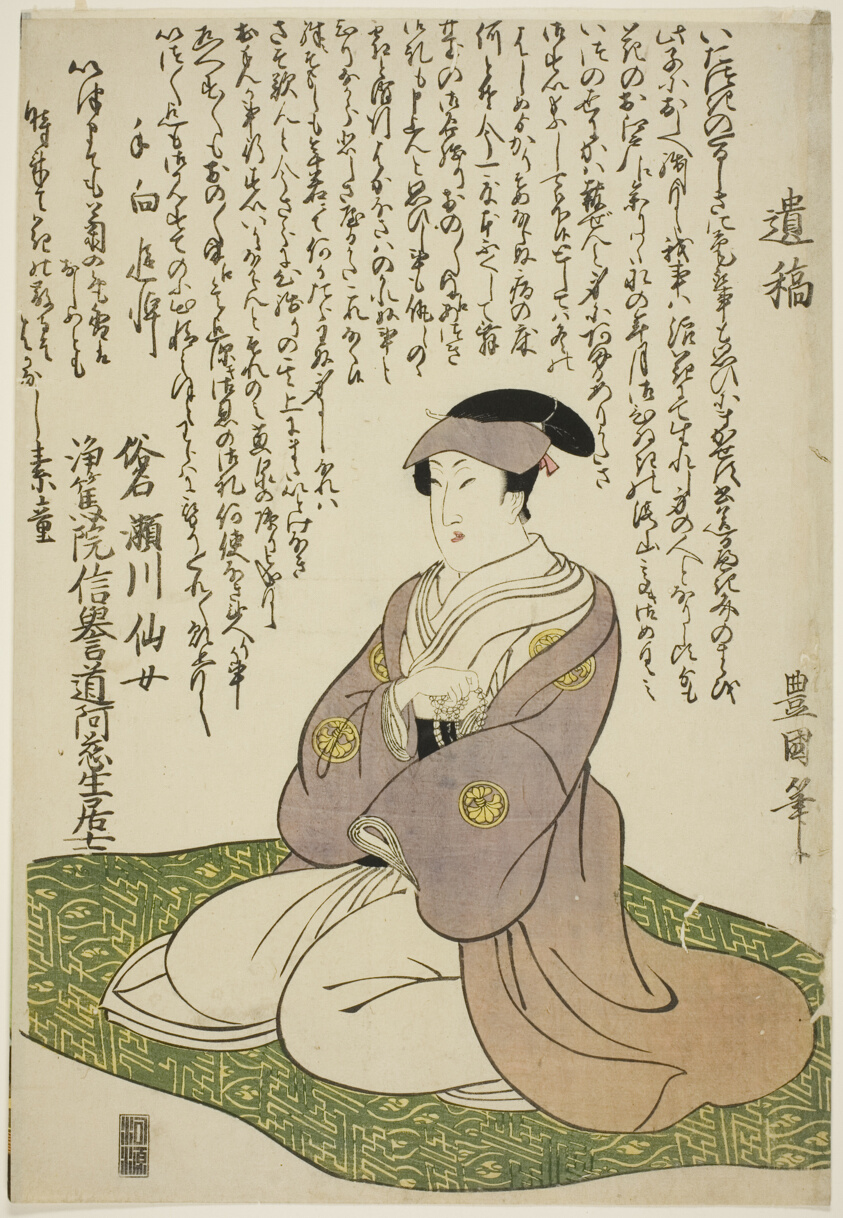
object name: Print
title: Memorial Portrait of the Actor Segawa Senjo (Segawa Kikunojo III)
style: Japanese (culture or style)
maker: Utagawa Toyokuni I 初代 歌川 豊国; Japanese, 1769–1825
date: 1810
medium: Color woodblock print; oban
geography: Japan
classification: print; asian art